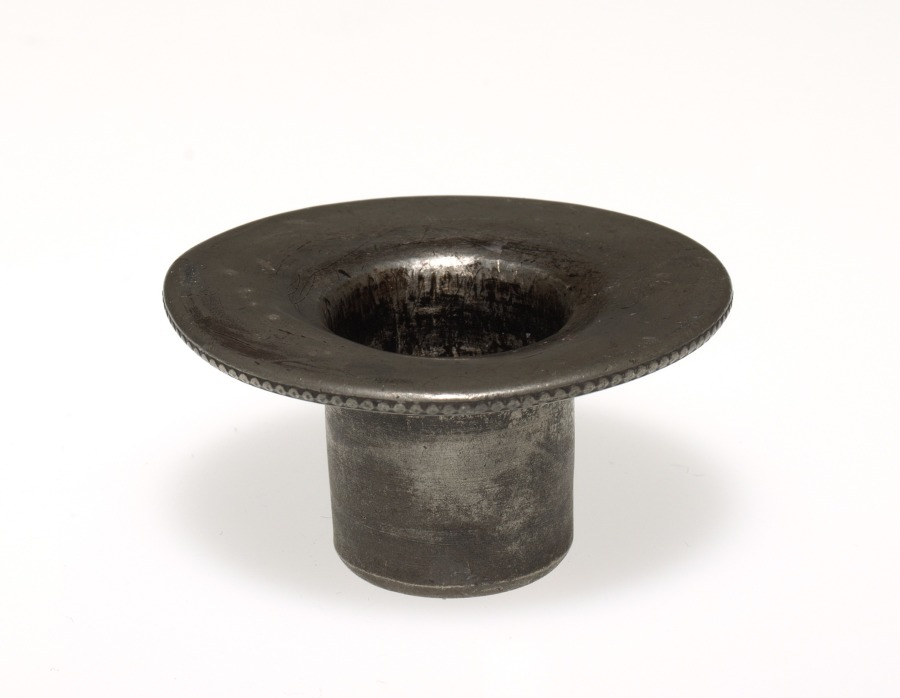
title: Pewter Bobeche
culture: America, Pennsylvania, Pittsburgh ?, mid 19th century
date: mid-1800s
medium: glass and detachable pewter bobeche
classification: Metalwork